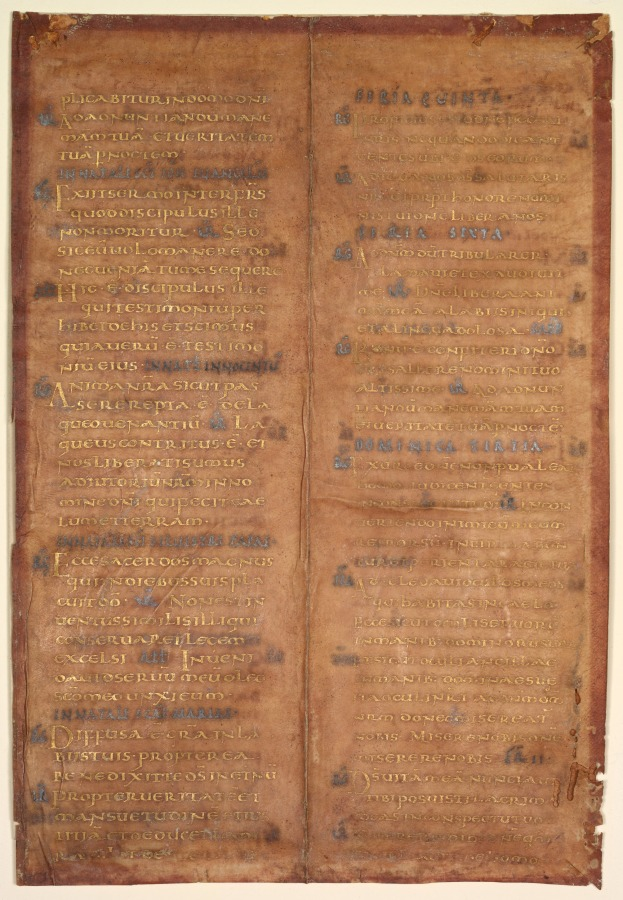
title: Bifolium Excised from a Carolingian Gradual (recto)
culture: Germany or Northeastern France, 9th century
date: c. 830–60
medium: gold and silver ink on purple parchment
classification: Manuscript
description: This rare leaf comes from a cantatorium or gradual, a book containing the chants to be sung during the Mass. Other leaves from the same book survive in Berlin and Trier. A bifolium, or double-leaf, does not contain decorated letters but rather "emphasized" letters. These were enlarged and pushed out into the margins to call attention to the eye. Such emphasized letters originated in late classical times and were the precursor to the decorated initial developed by medieval scribes. The purple-stained vellum (now faded to a deep pink) with its text written in gold and silver inks (now turned black) suggested great luxury with its sumptuous appearance. In Mediterranean regions, the purple dye was obtained from murex, a shellfish dye. In northern Europe, plant dyes were used as an alternative. Combined with the use of gold and silver ink a spectacular appearance was achieved that is traceable back to classical antiquity.